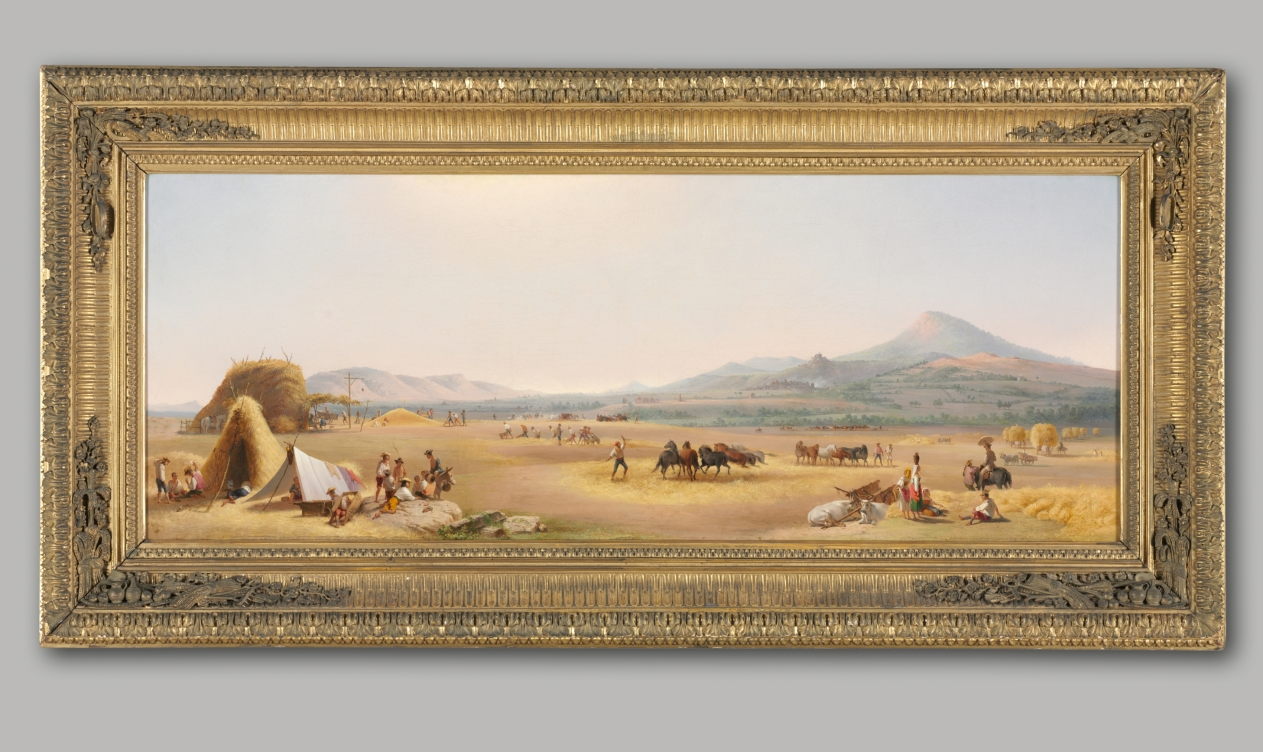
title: Harvest on the Roman Campagna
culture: America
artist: John Gadsby Chapman (American, 1808–1889)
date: 1868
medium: oil on canvas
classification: Painting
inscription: signed on the back: HARVEST ON THE ROMAN CAMPAGNA / FOR H. B. HURLBUT, ESQ. CLEVELAND, O. / BY John G. Chapman / Rome 1868